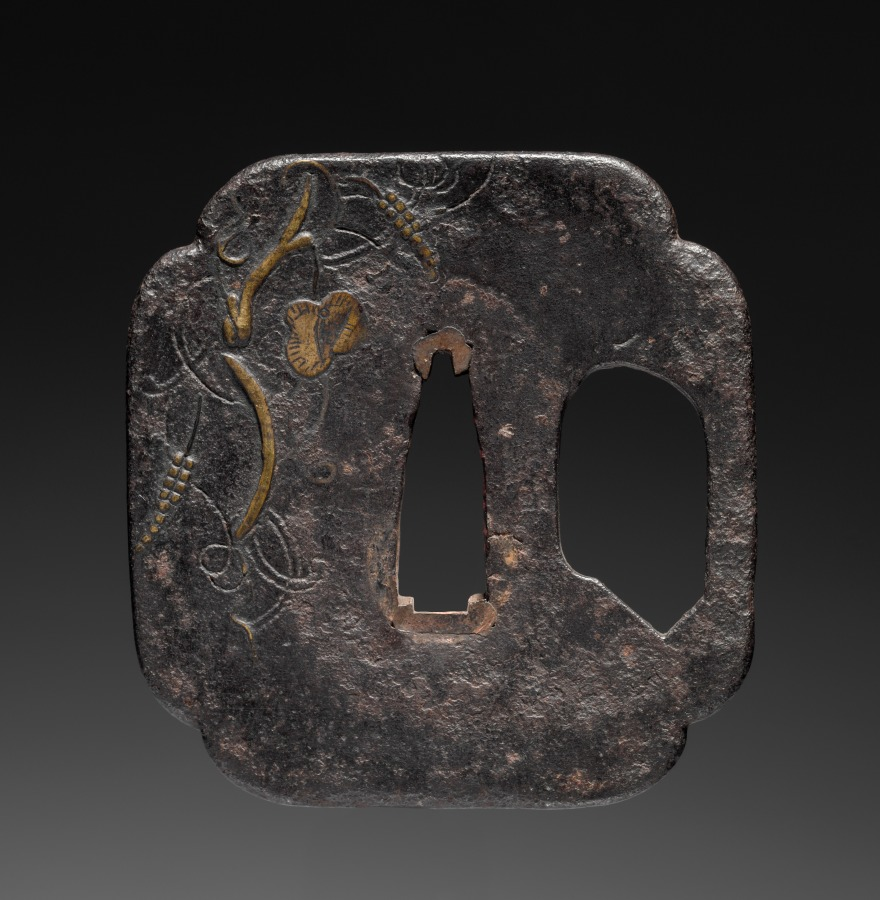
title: Sword Guard (Tsuba)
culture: Japan, possibly Edo period (1615-1868)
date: c. 1615–1868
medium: iron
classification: Arms and Armor